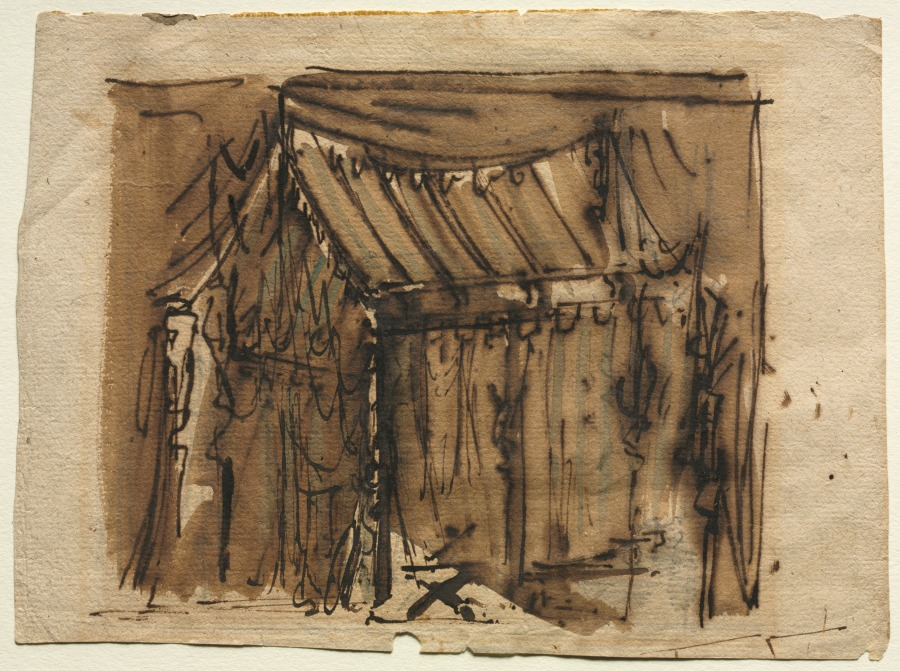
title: Tent (recto); Two Sketches (verso)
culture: Austria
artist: Josef Platzer (Austrian, 1751–1806)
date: late 1800s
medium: drawing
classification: Drawing